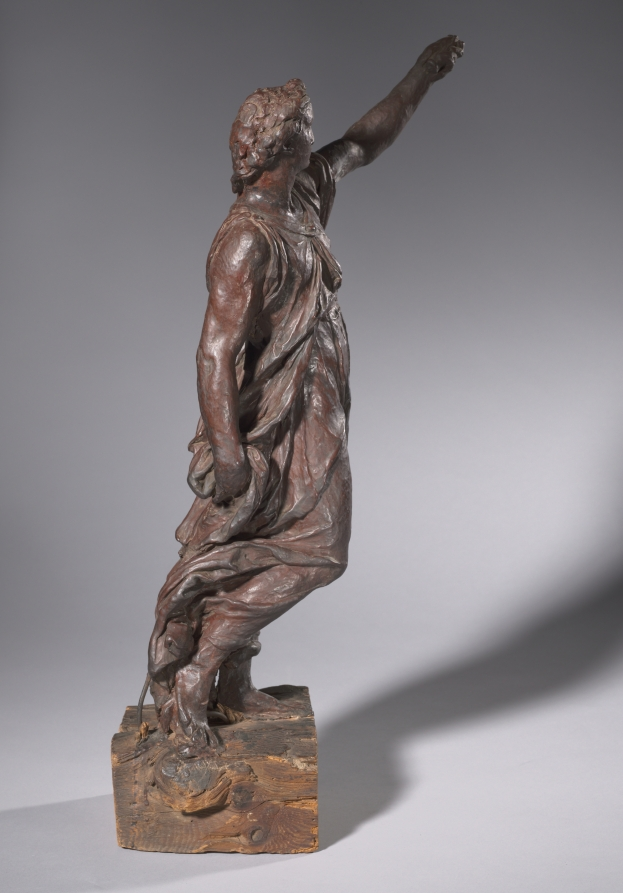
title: Model for an Angel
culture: Italy, Milan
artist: Annibale Fontana (Italian, 1540–1587)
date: c. 1583–84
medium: wax on a metal armature, mounted on wood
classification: Sculpture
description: Annibale Fontana created this wax model, perhaps in part for the patron’s approval, while preparing a sculpture for the Church of Santa Maria presso San Celso in Milan. The angel was mounted high on the facade, so the composition needed to be impeccably balanced as well as legible from the ground. Wings and a trumpet appear in the final work, but Fontana here concentrates on the deep folds, clinging drapery, and forceful pose.